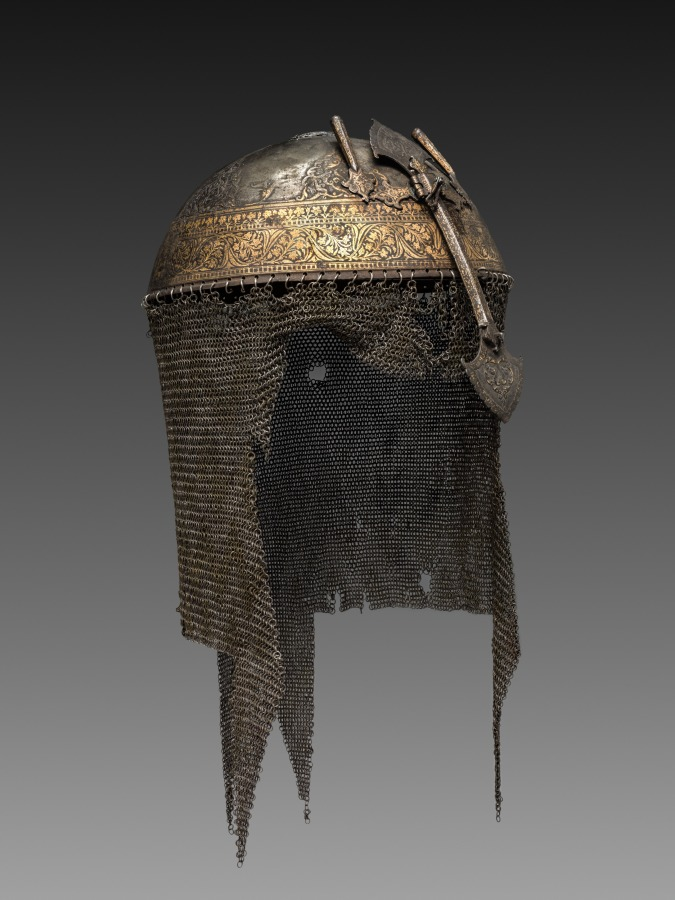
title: Helmet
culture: North India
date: 1600s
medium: steel with gold and brass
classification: Arms and Armor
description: Mughal soldiers wore hemispherical steel helmets to battle. This helmet’s surface features decorative floral patterns created using a process called damascening, in which gold wire was hammered into steel grooves. A leaf-shaped guard slides down in front of the nose for protection. The short tubes on either side of the nasal guard were for holding plumes, most popularly black heron feathers or white aigrettes. The spike that would have been on the apex has broken off. Also missing is the stuffed cotton padding that lined the interior. Chain mail made up of interlocking steel wire rings protected the ears, neck, and shoulders.